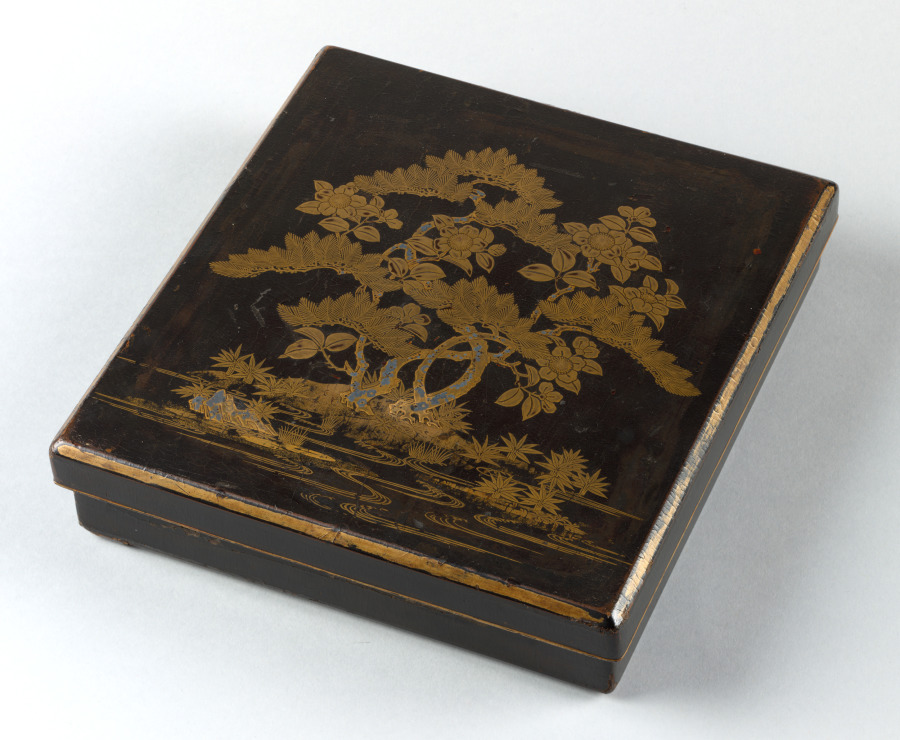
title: Writing Box (Suzuribako) with Pine, Camellia, and Bamboo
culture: Japan, Muromachi period (1392–1573)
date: 1400s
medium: Lacquered wood with gold and silver sprinkled powder (maki-e), stone, and metal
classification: Lacquer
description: Japanese writing boxes are designed to hold all the tools for traditional calligraphy, including an inkstone, water dropper, ink cake, and brushes. This box retains its inkstone and water dropper, the latter of which has a design of camellia and pine, matching the late winter, early spring lacquer motifs on the lid.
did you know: Pine, bamboo, and plum is a common seasonal motif; here the plum is replaced with camellia.